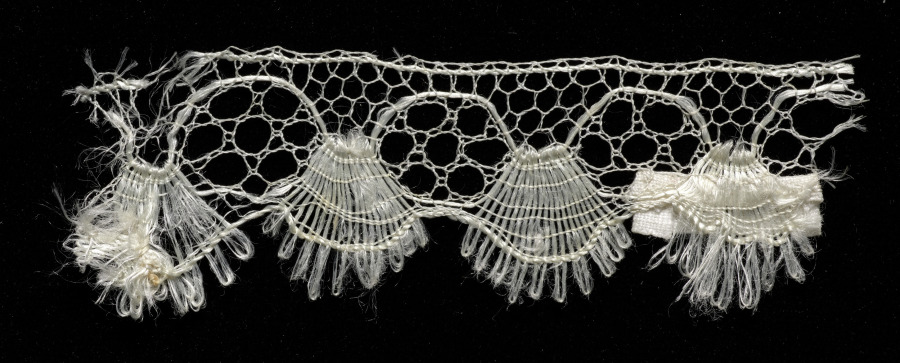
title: Lace Edging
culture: Spain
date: 1830–99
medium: Bobbin lace (blonde lace)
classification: Lace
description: This lace fragment dates from the time of Isabel II, who reigned from 1830 to 1904, and is a lace pattern called "Isabellina."